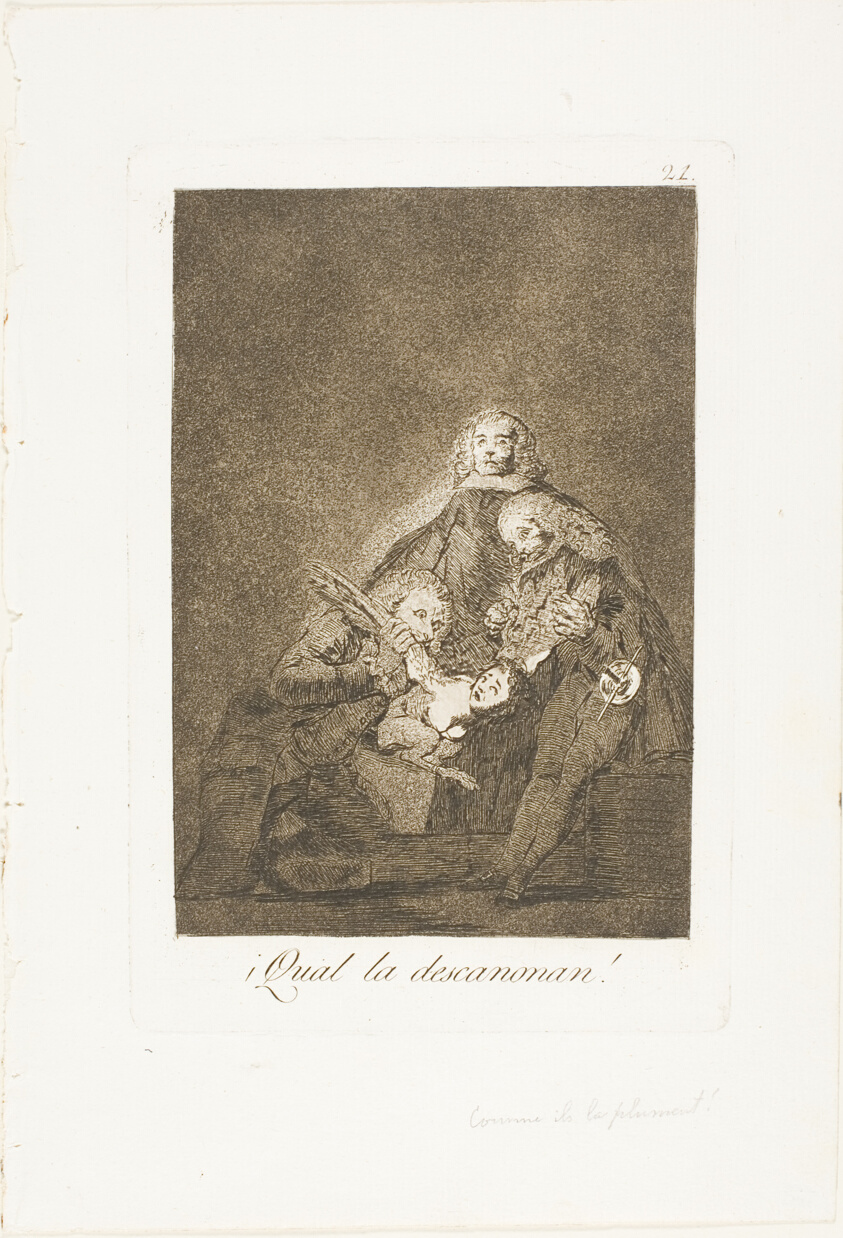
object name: Print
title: How they Pluck Her, plate 21 from Los Caprichos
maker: Francisco José de Goya y Lucientes (Spanish, 1746-1828)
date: 1797/99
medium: Etching and aquatint on ivory laid paper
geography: Spain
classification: etching; print; prints and drawing